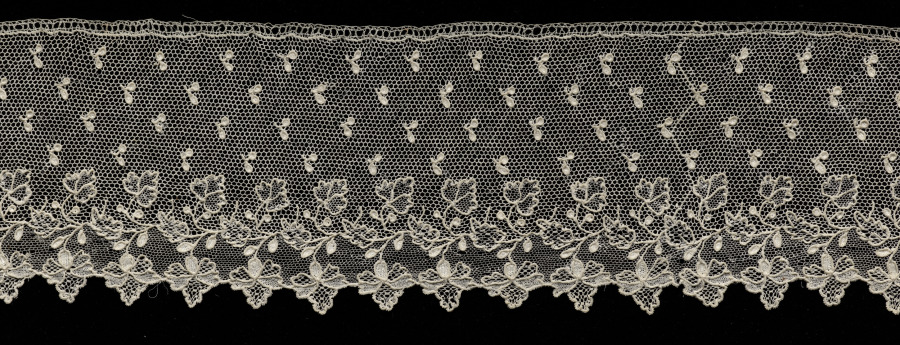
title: Lace Edging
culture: France, Alençon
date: 1774–92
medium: Linen: needle lace (Point d'Alençon)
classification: Lace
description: This piece of lace dates from the reign of Louis XVI, who reigned during 1774–92.